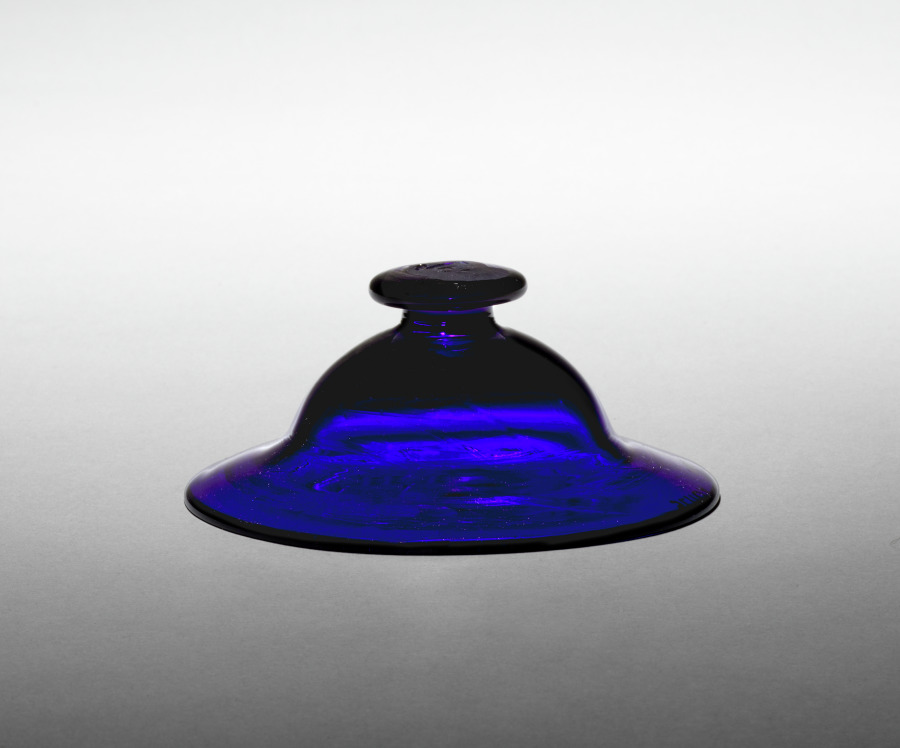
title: Sapphire Blue Sugar Bowl (lid)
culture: America, South Jersey Type, 19th century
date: c. 1840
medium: glass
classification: Glass